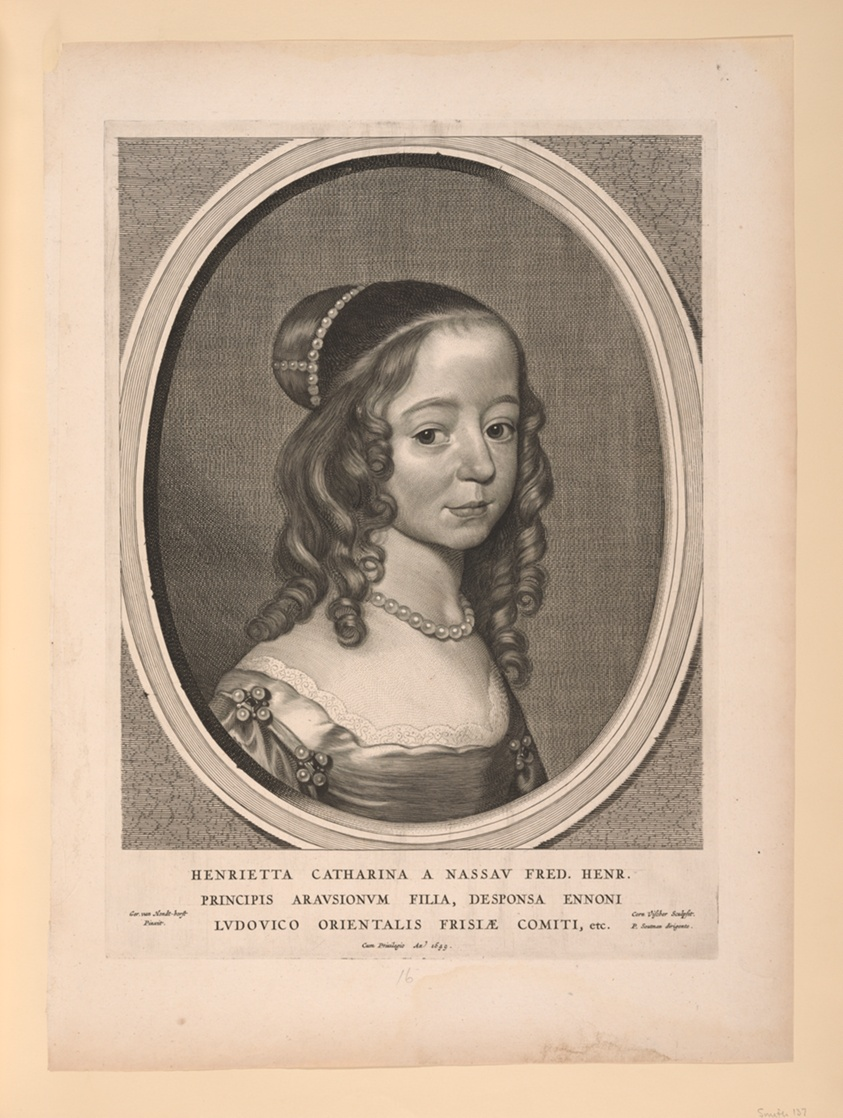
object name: Print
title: Henrietta Catharina, Princess of Orange Nassau, from Nine Portraits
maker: Cornelis Visscher (Dutch, c. 1629-1658); after Gerrit van Honthorst (Dutch, 1592-1656)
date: 1649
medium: Engraving on paper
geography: Netherlands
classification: engraving; paper; print; prints and drawing